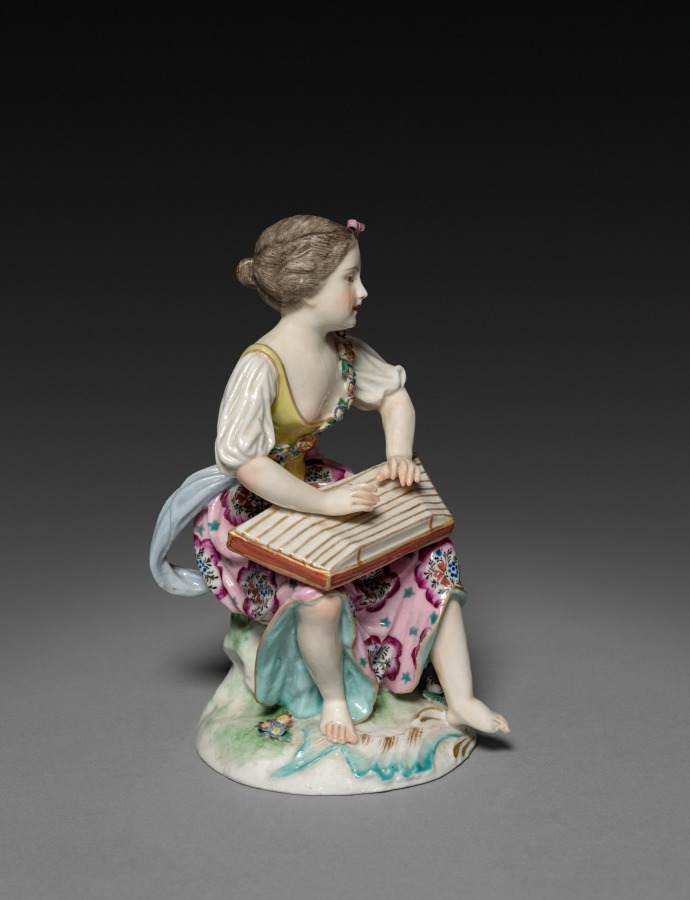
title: Girl Musician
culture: Germany, 18th century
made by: Frankenthal Porcelain Factory (German)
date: c. 1770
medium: porcelain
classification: Ceramic